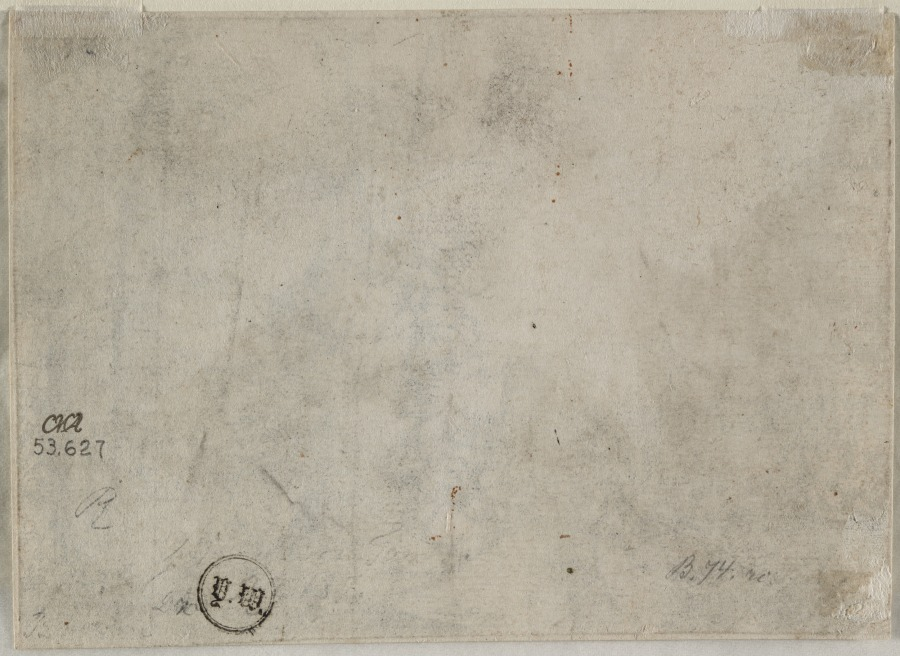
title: Landscape with Two Pines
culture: Germany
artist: Albrecht Altdorfer (German, c. 1480–1538)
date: 1521–22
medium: etching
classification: Print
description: Primarily a painter and draftsman, Albrecht Altdorfer made only nine etchings, which were intended to imitate his drawings. Those he made between 1522 and 1525—printed in very small numbers for a growing market of print collector—are considered the first prints in European art to depict pure landscape without narrative or devotional content. Here, he displayed remarkable freedom of draftsmanship and apparent spontaneity. The site depicted cannot be readily identified, and Altdorfer probably composed it from his imagination. Early etchings, such as this one, were made on iron rather than copper plates, which rendered the lines slightly hazy.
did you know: To make this early etching, the artist used an iron plate rather than the more supple copper, which would shortly come to dominate etching technique.